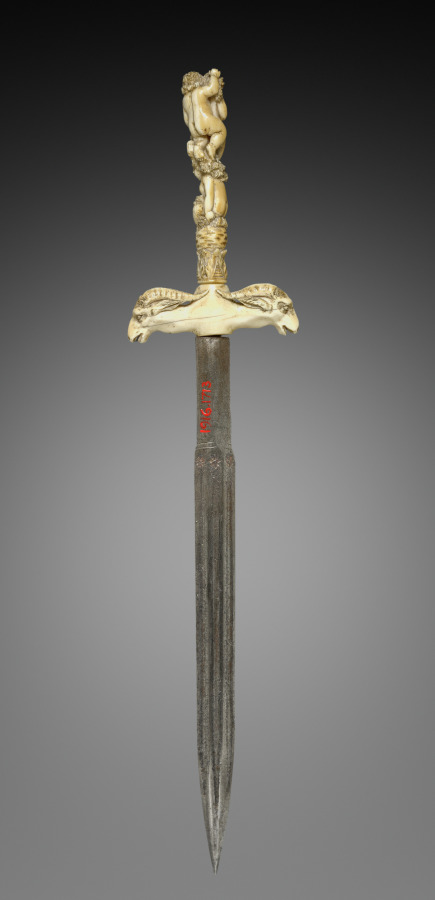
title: Dagger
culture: Italy, late 17th Century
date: late 1600s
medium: steel and ivory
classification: Arms and Armor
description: The carved grip of this dagger depicts the female followers of Bacchus, the Roman god of wine.